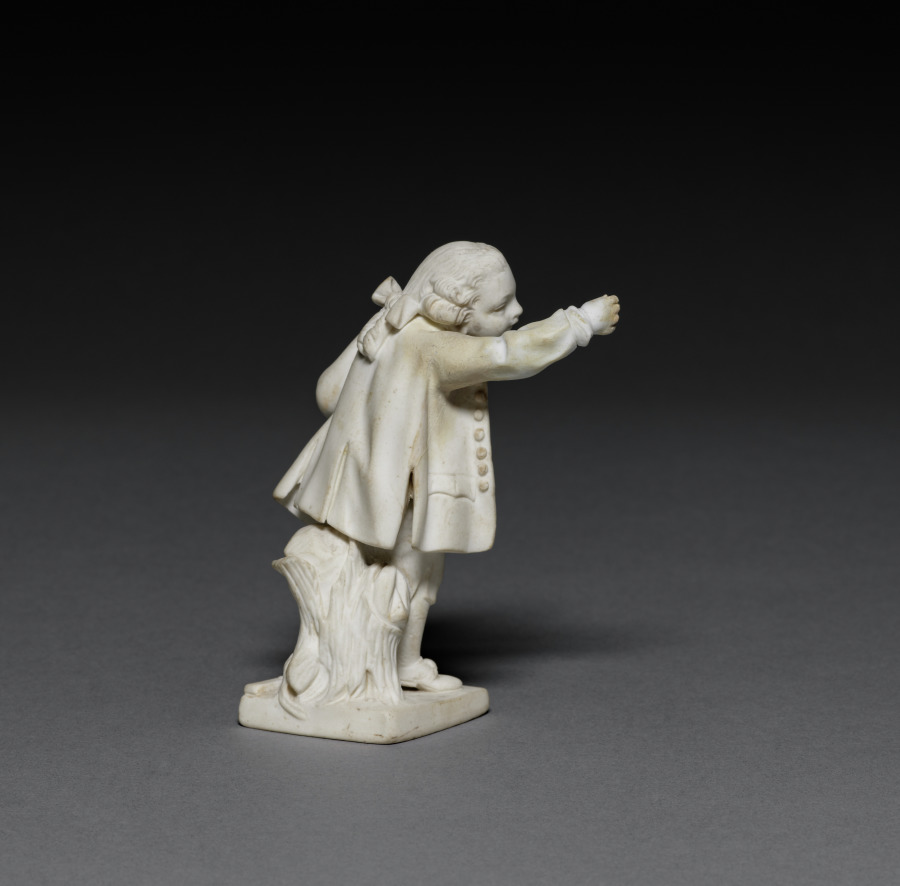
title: Figure of a Bird Charmer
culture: France, Sèvres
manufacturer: Sèvres Porcelain Factory (French, est. 1756)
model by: Etienne-Maurice Falconet (French, 1716–1791)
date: 1764–66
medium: Unglazed soft-paste porcelain (biscuit)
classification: Ceramic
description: Designs for 17 young children involved in various activities were issued by sculptor Étienne-Maurice Falconet and regularly reproduced as porcelain figurines. This figure, who stretches out his hand in anticipation that a bird might land, would have been modeled after one of these designs. Decorative figurines like these were often included in elaborate dining services to be placed about a table along with the usual tureens and tableware.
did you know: 31 figures modeled after Falconet’s series were included in the dinner service given by French King Louis XV to Christian VII, King of Denmark in 1768.